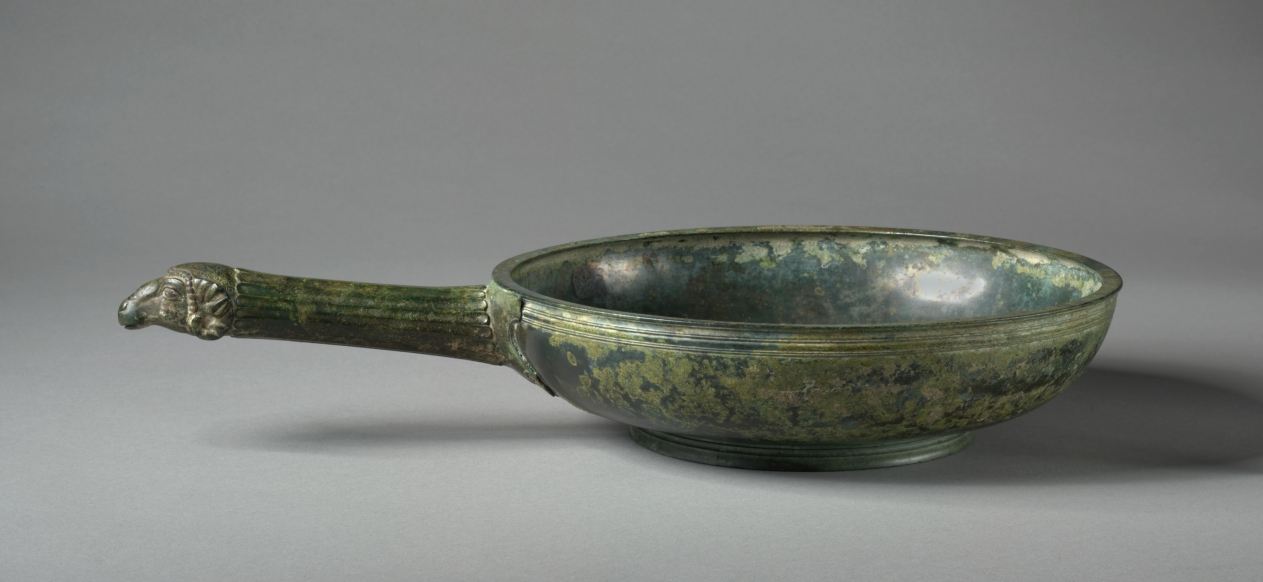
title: Patera with Fluted Handle and Ram Head Finial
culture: Greece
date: 500–400 BCE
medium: bronze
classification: Metalwork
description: This patera is made from a shallow bronze dish attached to a fluted handle, terminating in a ram’s head. The ram’s head is realistically rendered through careful modeling and a high level of detail. Though the patera looks much like a modern frying pan, in antiquity it would have been used for pouring wine during important rituals.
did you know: Ivy leaves, like the tiny example found under the patera's handle, were associated with wine and revelry.